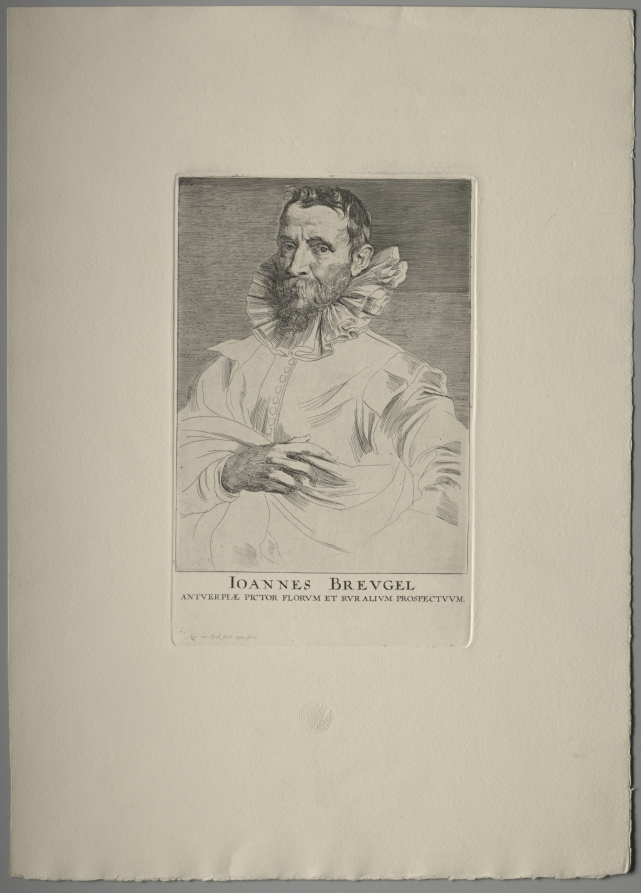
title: Jan Brueghel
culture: Flanders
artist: Anthony van Dyck (Flemish, 1599–1641)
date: 1630–33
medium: etching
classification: Print